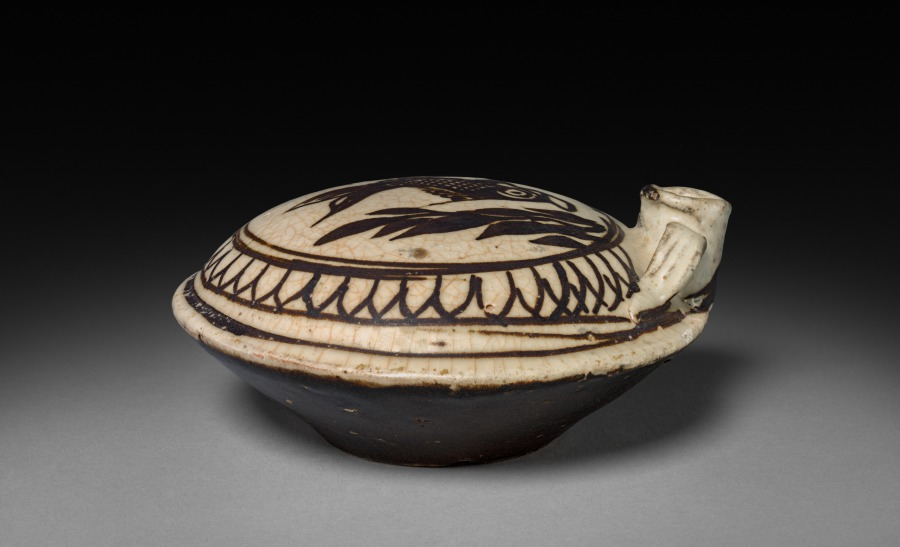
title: Water Dropper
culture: China, Yuan dynasty (1271-1368)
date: 1271–1368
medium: Stoneware, Cizhou ware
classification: Ceramic